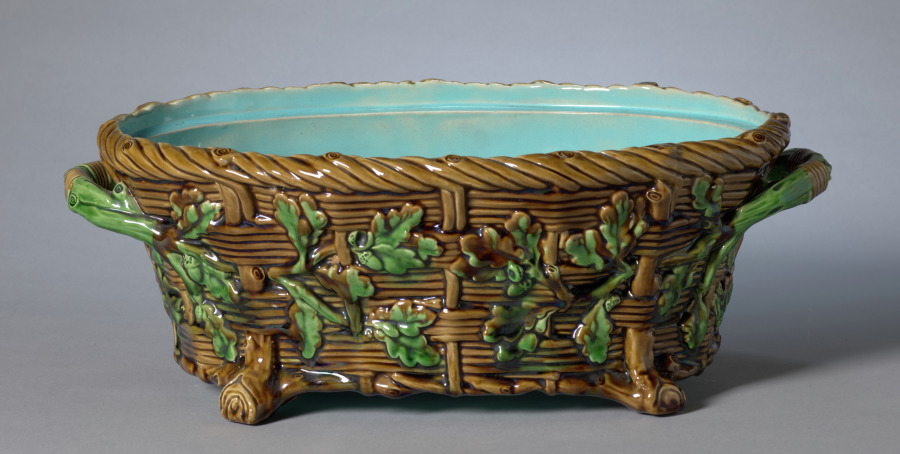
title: Game Pie Dish (Dish)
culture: England, 19th century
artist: Minton Pottery and Porcelain Factory (British)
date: c. 1860–80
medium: earthenware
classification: Ceramic